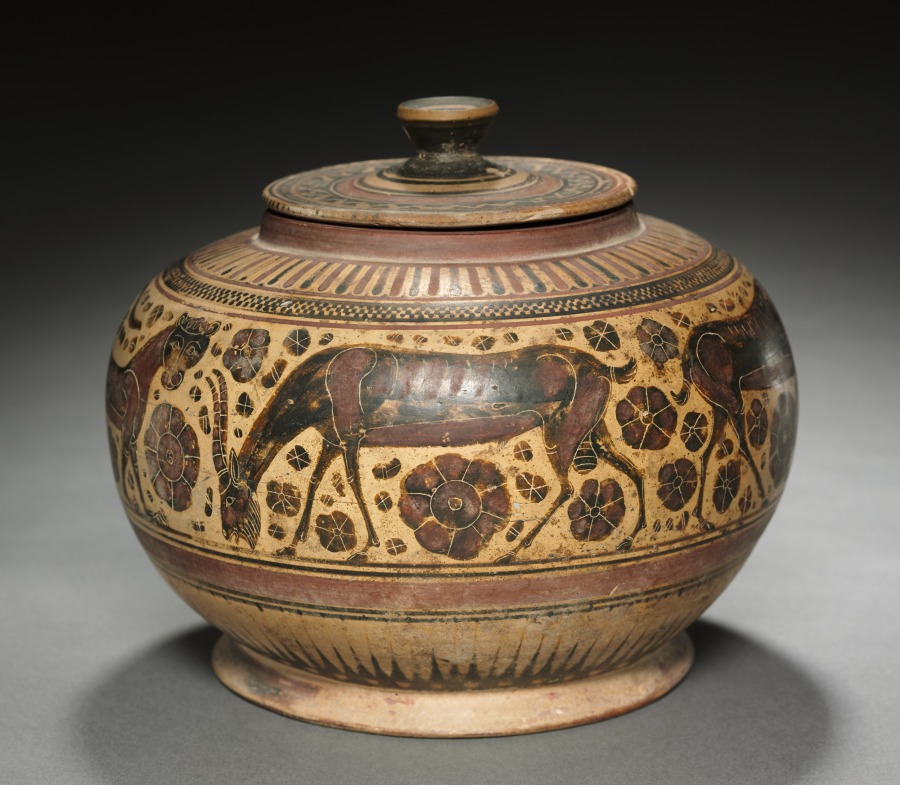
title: Black-Figure Pyxis (Cylindrical Lidded Box): Animals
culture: Greek, Corinthian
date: 600s–500s BCE, with modern painting and incision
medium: ceramic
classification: Ceramic